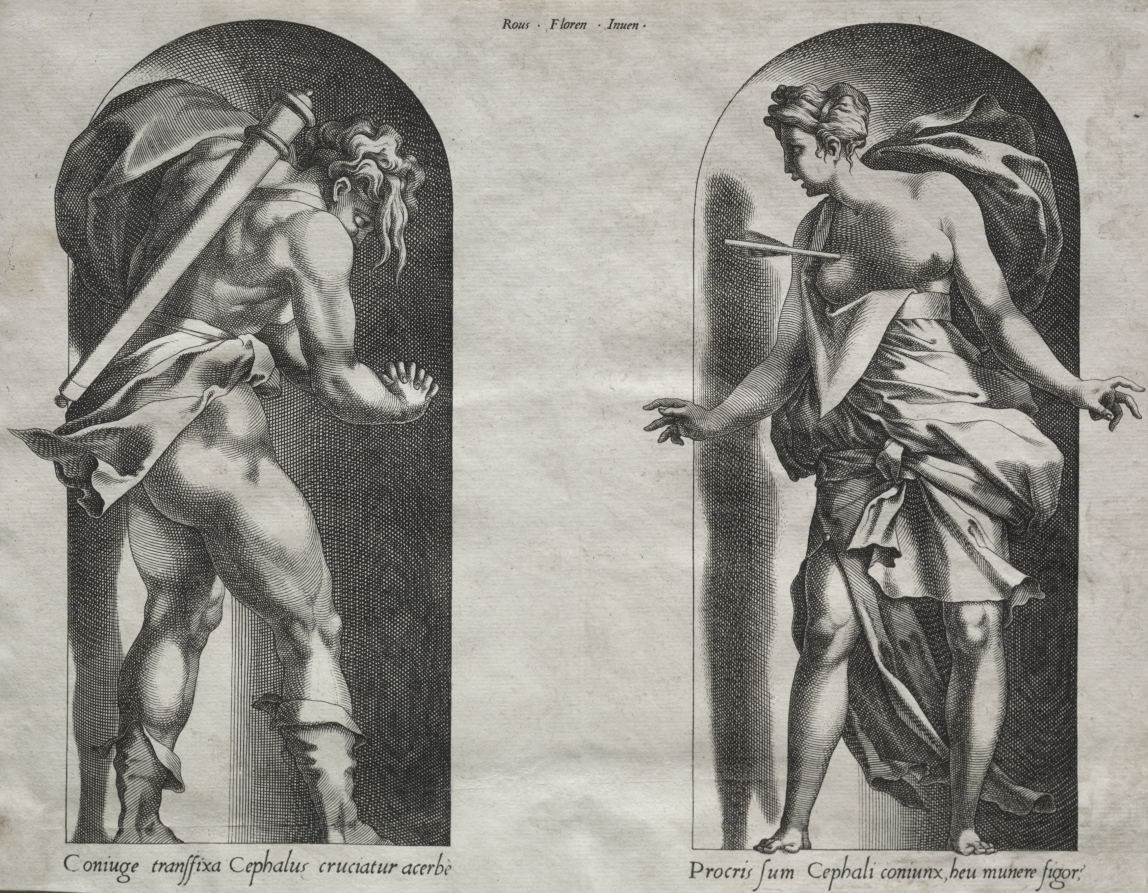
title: Cephalus and Procris in two Niches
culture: France, 16th century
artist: René Boyvin (French, c. 1525–after 1580)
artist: after Rosso Fiorentino (Italian, 1494–1540)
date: 1538–1540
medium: engraving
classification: Print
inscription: upper center, in plate: Rous · Floren · Inven · ; lower right, in plate: Coniuge transfixa Cephalus cruciatur acerbè ; lower right, in plate: Procris sum Cephali coniunx, heu munere figor?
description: The Italian Renaissance made an impact outside Italy in the second quarter of the 1500s, when the French king François I invited Italian artists to oversee the decorative program of his chateau at Fontainebleau. Arriving in 1530, Rosso Fiorentino had been deeply influenced by Michelangelo’s Sistine Chapel ceiling frescoes, which he had seen while working in Rome between 1524 and 1527. Rosso’s designs for two figures in niches (which were engraved by René Boyvin) imitate the complexity and tension of Michelangelo’s nudes. In this story from Ovid’s Metamorphoses, Cephalus has accidentally impaled his wife Procris, who had been spying on him from the bushes.